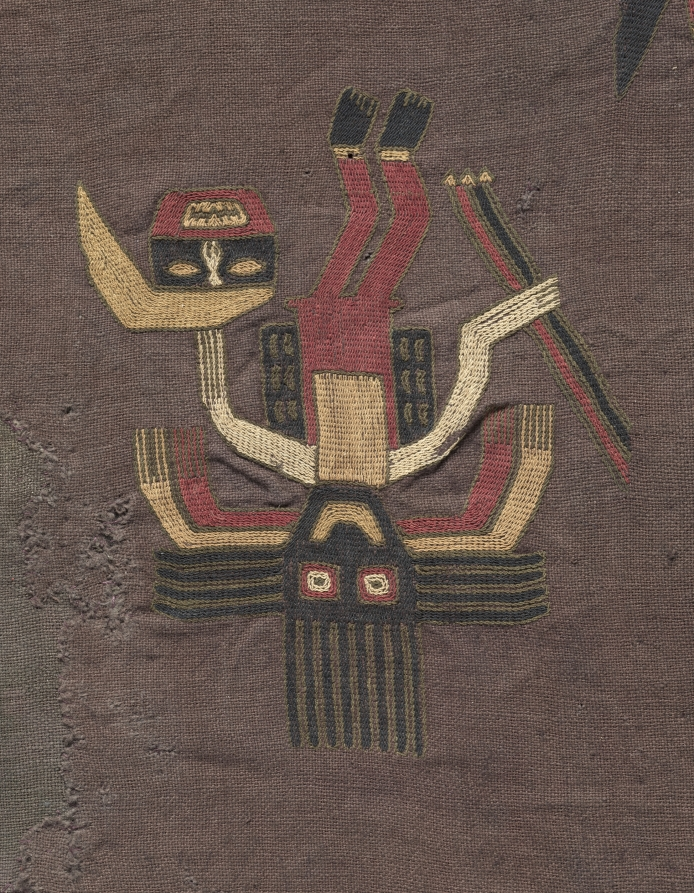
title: Fragment of Embroidered Cloth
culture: Peru, South Coast, Paracas, Late Period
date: c. 300–100 BCE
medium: embroidery on plain wool ground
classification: Textile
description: The repetition of a nonmythical figure, in this case a warrior holding spears and a trophy head, was one of the important innovations of Paracas textile design during the Late Paracas period. The trophy head cult was an essential aspect of crop fertility and was, therefore, a focal point of Paracas art in general.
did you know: Extremely dry conditions on Peru's desert coast allow for the extraordinary preservation of textiles.